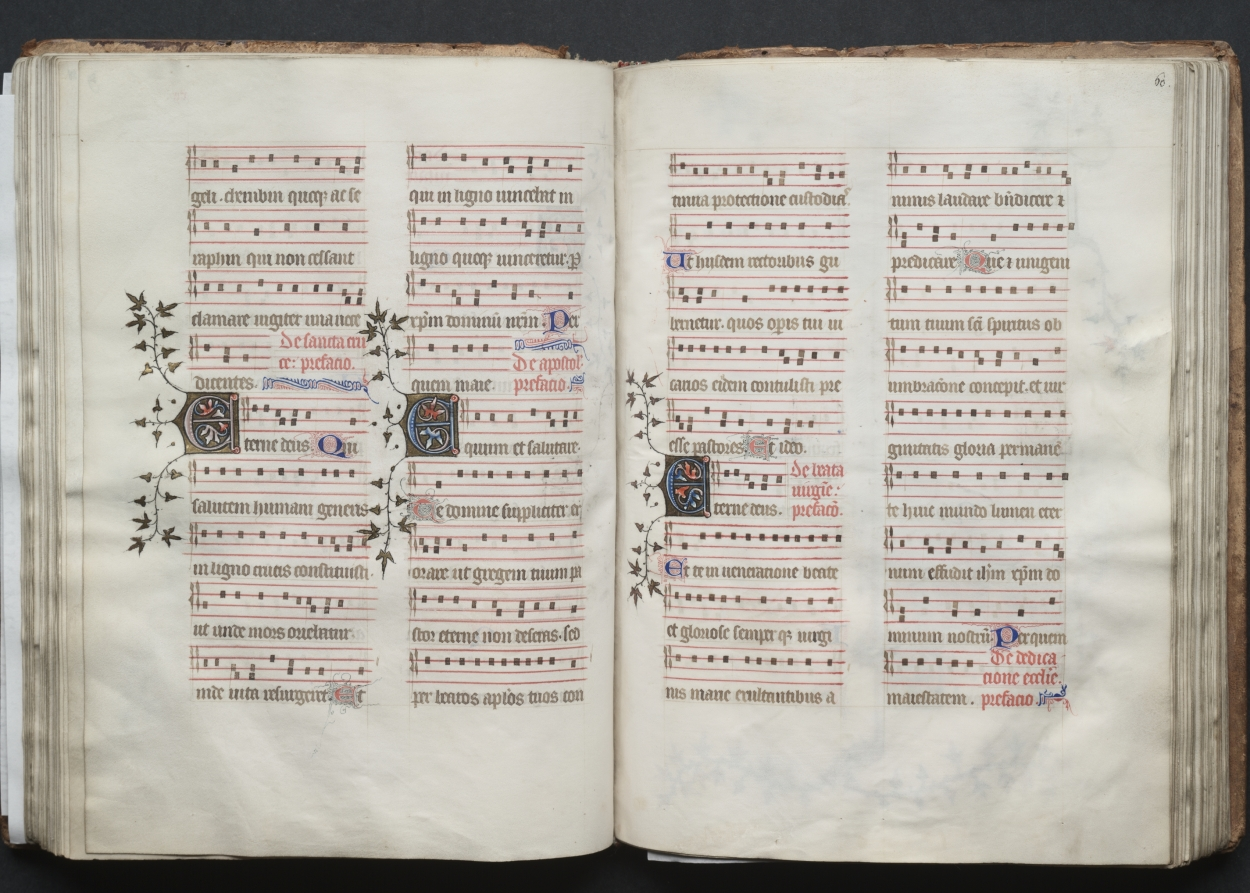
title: The Gotha Missal: Fol. 59v, Text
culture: France, Paris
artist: Master of the Boqueteaux (French)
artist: and Workshop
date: c. 1375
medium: ink, tempera, and gold on vellum; blind-tooled leather binding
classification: Bound Volume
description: The style and quality of this manuscript's decoration is typical of deluxe Parisian books made for aristocratic or royal patrons. Most of the book's decoration appears to be the work of the Master of the Boqueteaux, an artist active at the court of King Charles V (died 1380). His style was apparently shared by a number of book illuminators working in and around Paris. It is very possible that the Gotha Missal belonged to Charles V, but is not provable because the manuscript has no royal portraits and lacks a colophon. Given the book's magnificent decoration, however, it would seem that it was produced for a Valois prince, if not for the king himself. The manuscript receives its name from the German dukes of Gotha, its later owners.